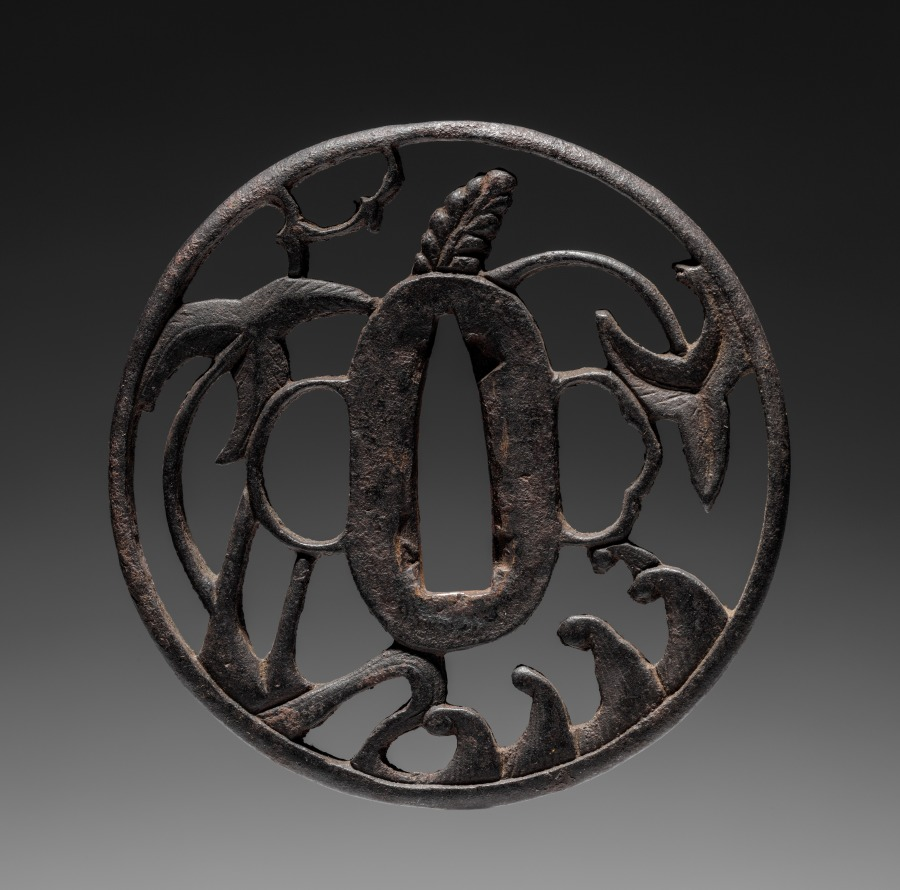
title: Sword Guard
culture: Japan, Edo period (1615–1868)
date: c. 1800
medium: iron (Choshu type)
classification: Arms and Armor